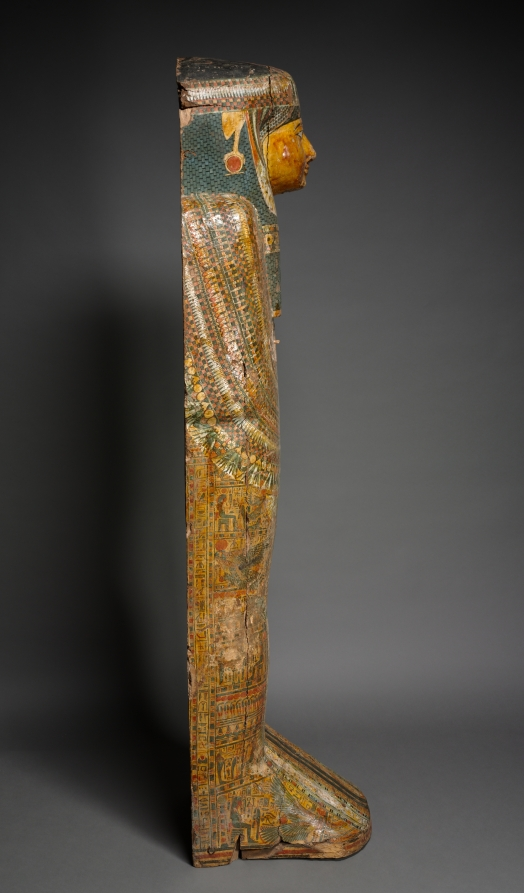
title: Coffin of Nesykhonsu (lid)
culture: Egypt, Third Intermediate (1069–715 BCE), Dynasties 21–22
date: c. 976–889 BCE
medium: gessoed and painted sycamore fig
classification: Funerary Equipment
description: A complete set of coffins during the late New Kingdom and Third Intermediate Period consisted of an outer and inner coffin and a mummy board (essentially a lid without a case, placed directly over the wrapped mummy). Judging by its size, this must have been Nesykhonsu's outer coffin. The type is essentially the same as the coffin of Bakenmut, which was also an outer coffin. The two coffins are said to have been found together and to have belonged to a man and wife. This is quite possible, although the inscriptions do not bear it out. Bakenmut is not mentioned on Nesykhonsu's coffin, nor is she mentioned on his. There was by this time a tremendous repertoire of scenes appropriate for coffin decoration. Whereas Bakenmut's coffin features images of deified dead pharaohs, Nesykhonsu's is decorated in a more personal way with scenes from her own funeral. The main scene in the interior (near the top) shows a priest clad in a panther skin with the mummy of Nesykhonsu behind. The god appears in mummy form and wears a sun disk on his head. The scarab beetle inside the sun disk identifies him as Khepri, the morning sun, and the hieroglyphs to the right identify him as Atum, the evening sun. Taken together, image and text represent the sun god in both his rising and setting, youthful and aged aspects.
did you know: Two of Nesykhonsu's titles, "Lady of the House" and "Singer of the Choir of Mut the Great," are written on the outside of the coffin.